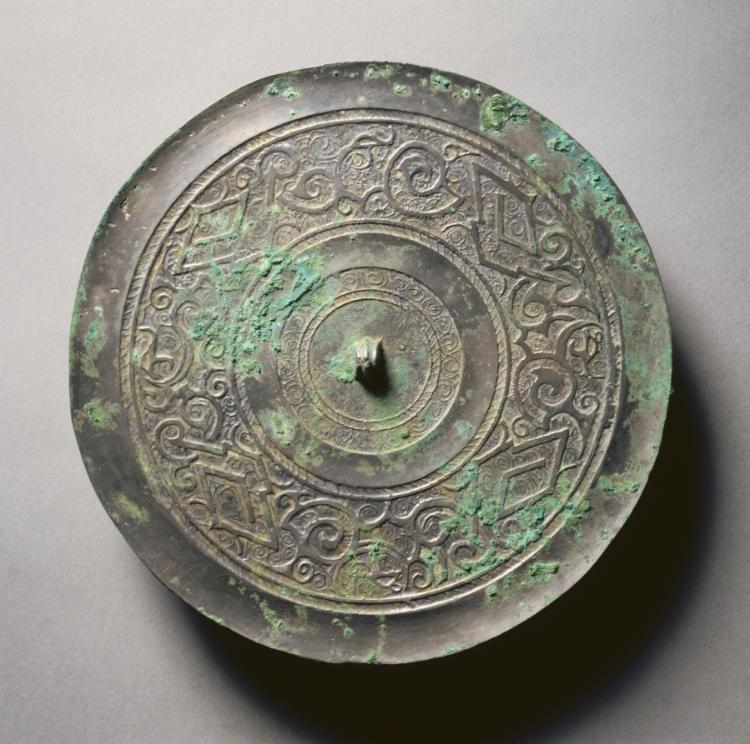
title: Mirror with Serpentine Interlaces and Angular Meanders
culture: China, Eastern Zhou dynasty (770–256 BCE), Warring States period (475–221 BCE)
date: early 500s–late 300s BCE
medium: bronze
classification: Metalwork